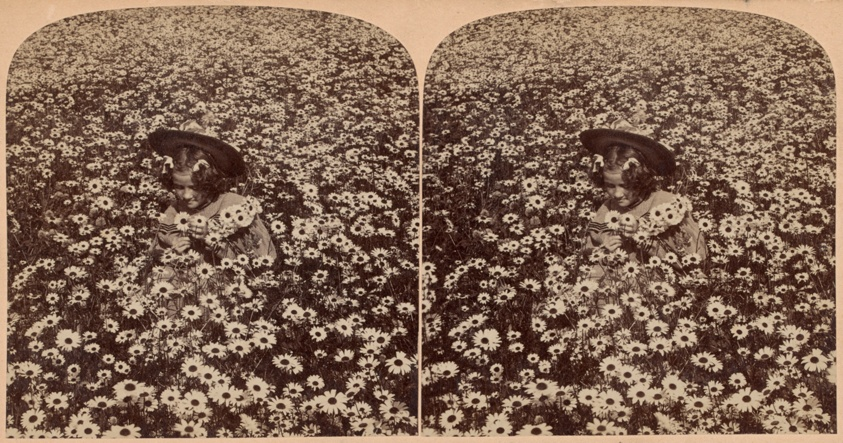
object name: Photograph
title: In the Daisy Field - "Sweet flow'ret of the rural glade"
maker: Underwood & Underwood (American, active 1881-1920)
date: 1897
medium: Albumen print, stereo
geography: New York City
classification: photography; photograph